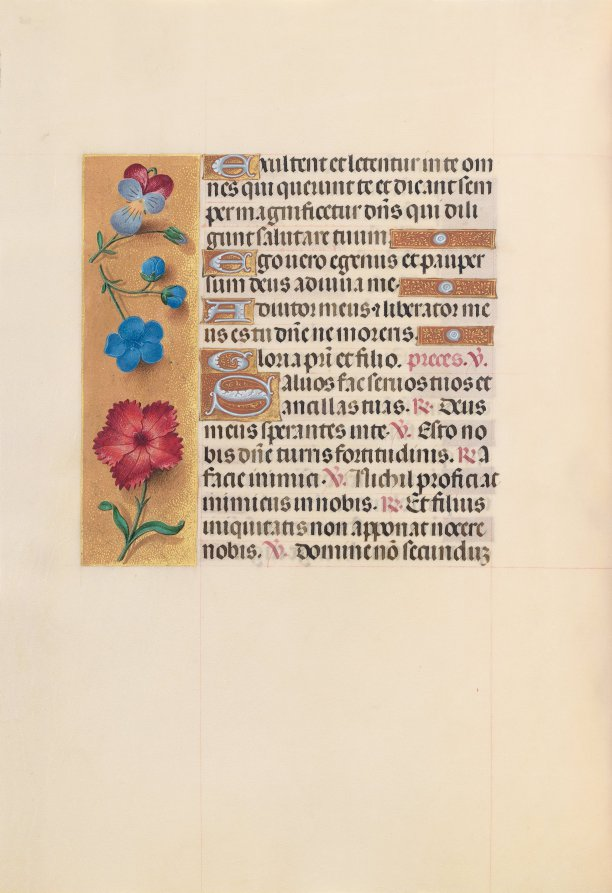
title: Hours of Queen Isabella the Catholic, Queen of Spain: Fol. 215v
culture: Flanders, Ghent and Bruges, late 15th century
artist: Master of the First Prayerbook of Maximillian (Flemish, c. 1444–1519)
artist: and Associates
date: c. 1500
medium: ink, tempera, and gold on vellum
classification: Bound Volume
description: This manuscript was illuminated by a circle of at least five highly organized manuscript painters active in the Flemish cities of Ghent and Bruges. The principal illuminator was Alexander Bening, who painted the majority of the book's miniatures. Manuscripts produced by this circle of artists are renowned for the decoration of their borders, which typically feature a rich variety of realistically-painted flowers, birds, and butterflies. This prayer book, called a book of hours, was intended not for a cleric, but for the private devotions of a lay person-in this case, Isabella the Catholic, Queen of Spain (1451-1504). Isabella's coat of arms embellishes the book's frontispiece. It is unlikely that the book was commissioned by the Queen herself; rather, she probably received it as a diplomatic gift from someone courting her patronage, perhaps Cardinal Francisco Jimenez de Cisneros. A Franciscan friar, Jimenez was dependent upon Isabella for his advancement, first to the post of Queen's confessor in 1492, and then to Archbishop of Toledo in 1495.